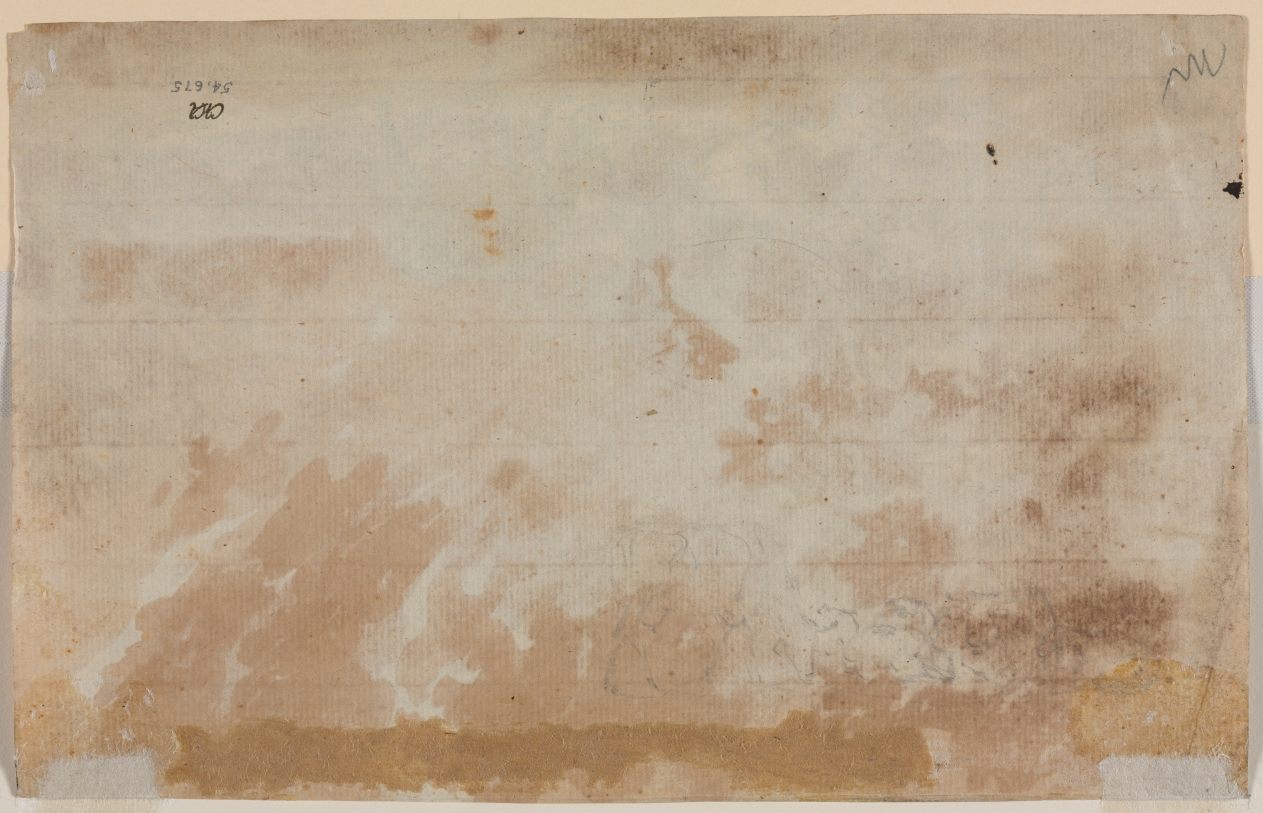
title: Cattle (verso)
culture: France, 19th century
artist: Jules Dupré (French, 1811–1889)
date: mid- to late 1800s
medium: graphite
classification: Drawing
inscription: upper right, in graphite: [m ?]